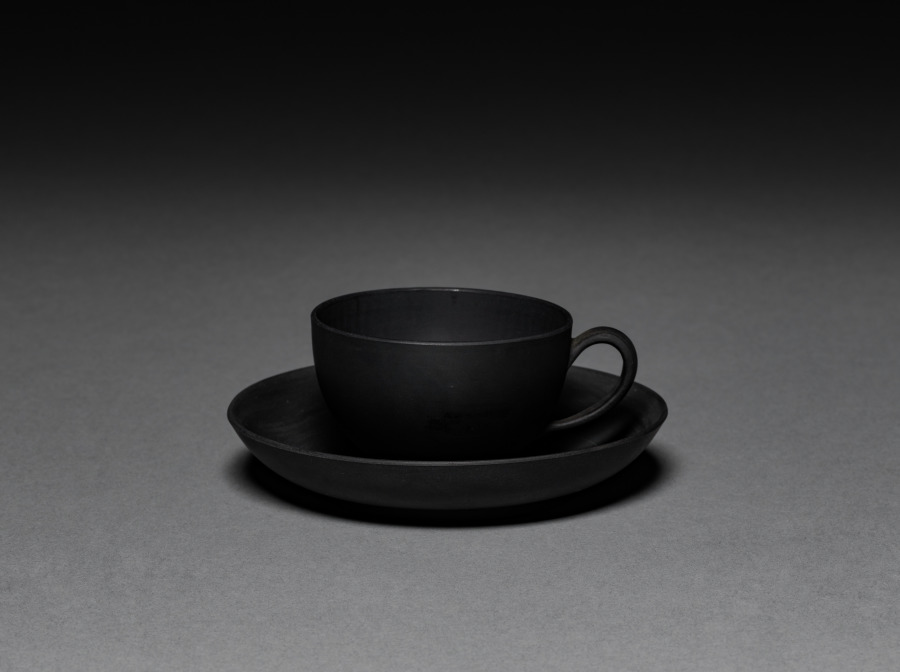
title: Cup and Saucer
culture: England, Staffordshire, late 18th century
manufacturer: Wedgwood Factory (British)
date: late 1700s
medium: pottery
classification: Ceramic